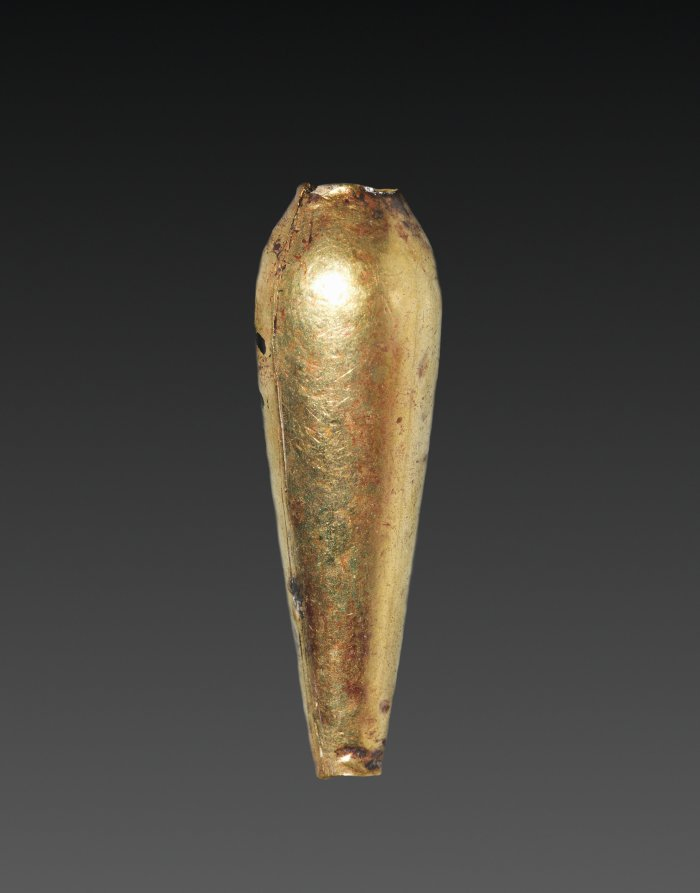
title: Teardrop-Shaped Bead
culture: Egypt, Middle Kingdom (2040–1648 BCE), Dynasty 12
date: 1980–1801 BCE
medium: gold over calcite gesso core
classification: Jewelry